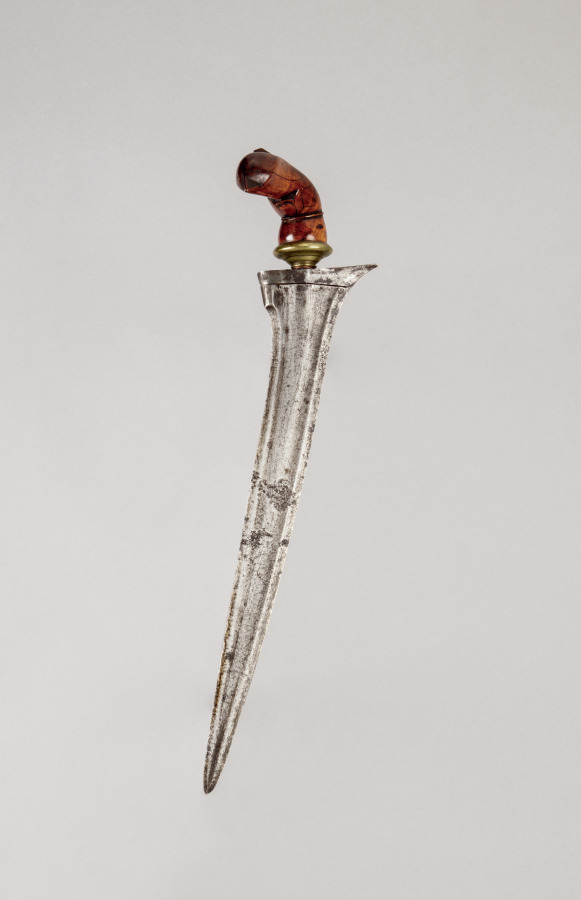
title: Sword (Kris)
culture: Java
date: 1800s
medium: iron with wooden handle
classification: Arms and Armor